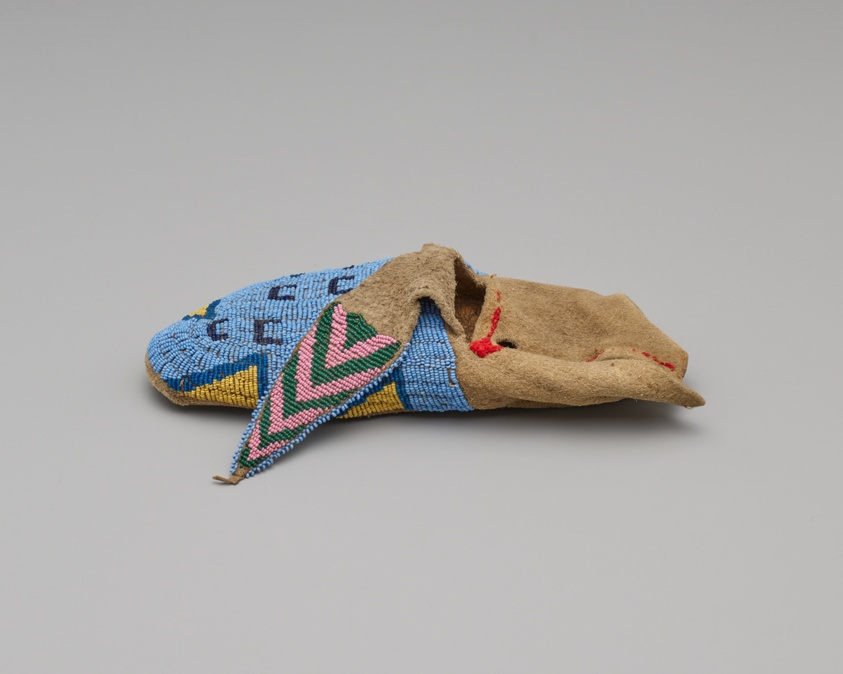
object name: Costume and Accessories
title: Man's Moccasins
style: arapaho, plains indian, native american, americas, Arts of the Americas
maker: Artist unknown (possibly Arapaho, Hinono’ei); Central Plains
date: 1885-90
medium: Leather, red yarn, and glass beads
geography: Central Plains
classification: beadwork; costume; art of the americas